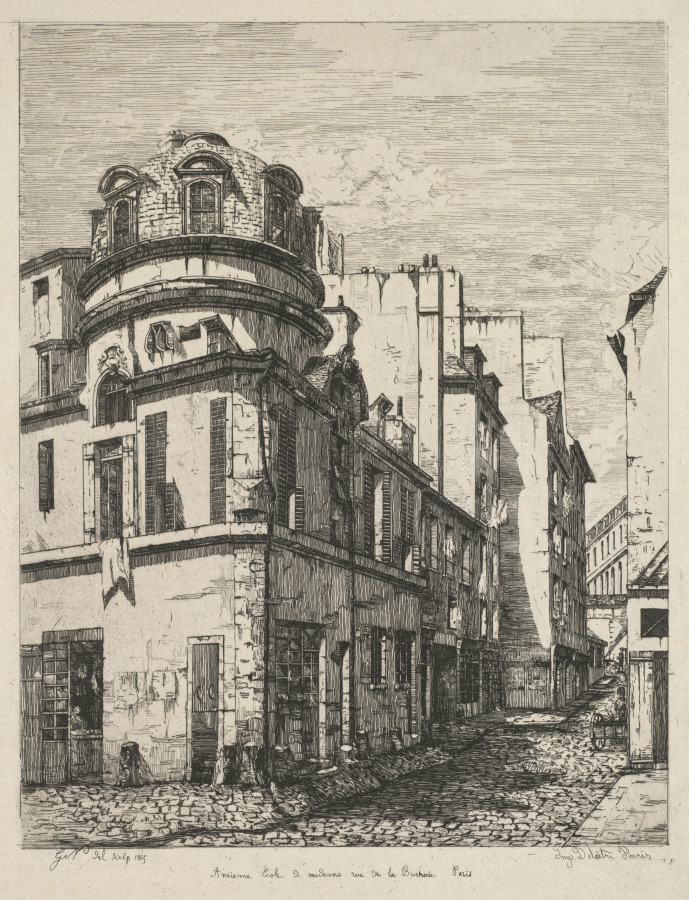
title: Eaux-Fortes sur le Vieux Paris: Ancienne école de médecine rue de la Bûcherie (Etchings of Old Paris: Former Medical School, rue de la Bucherie)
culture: France, 19th century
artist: Gabrielle Niel (French, 1831–1919)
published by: Published by Cadart, Printed by Auguste Delatre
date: 1865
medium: etching on chine collé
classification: Print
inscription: In plate, lower left corner: G.N. del. sculp/ 1865; lower right corner: Imp. Delatre Paris; center: Ancienne école de médecine rue de la Bucherie Secondary support: lower left corner: collection stamp from the Alfred Morrison collection. Lower left corner, in graphite: Beraldi 3. the Alfred Morrison Collection; lower right corner, in graphite: by Mlle. Gabrielle Niel 1865